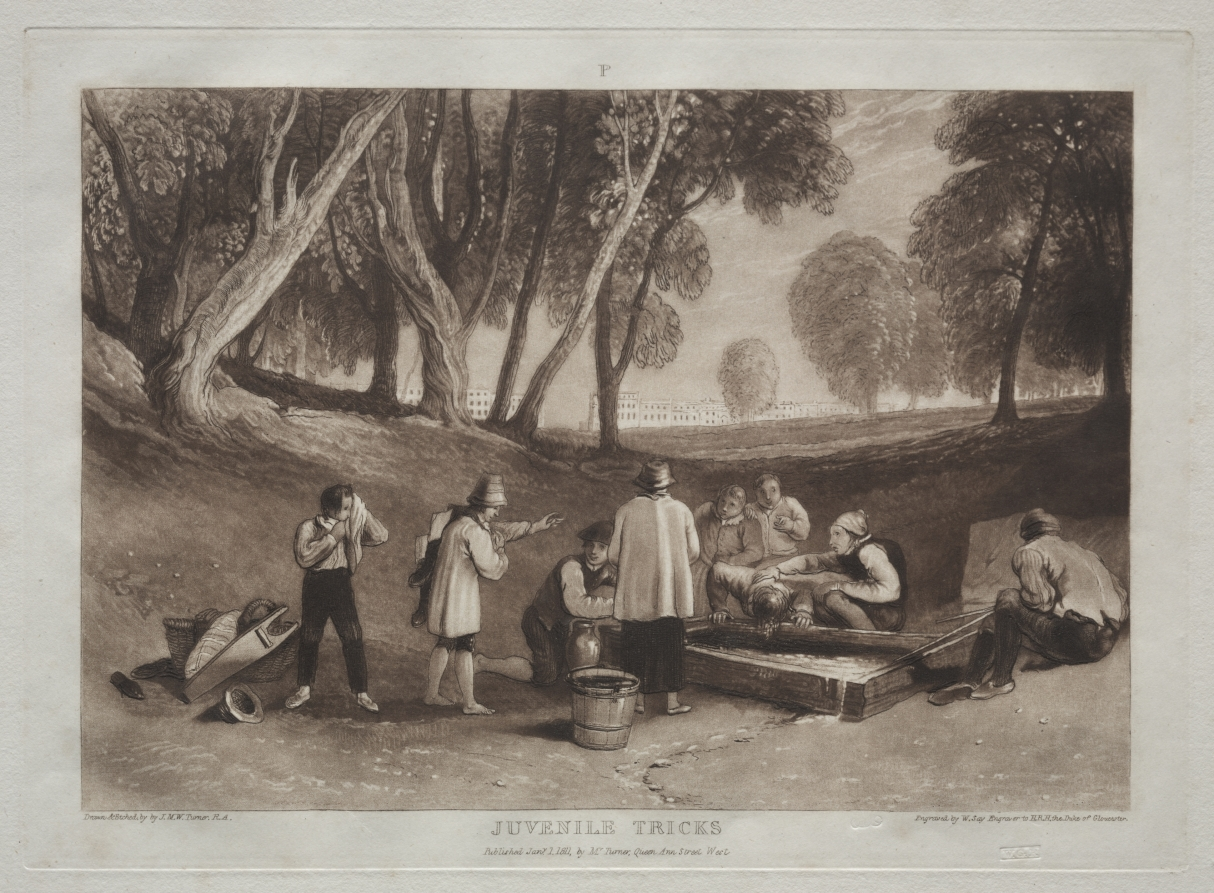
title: Liber Studiorum: Juvenile Tricks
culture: England, 19th century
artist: Joseph Mallord William Turner (British, 1775–1851)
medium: etching and mezzotint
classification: Print